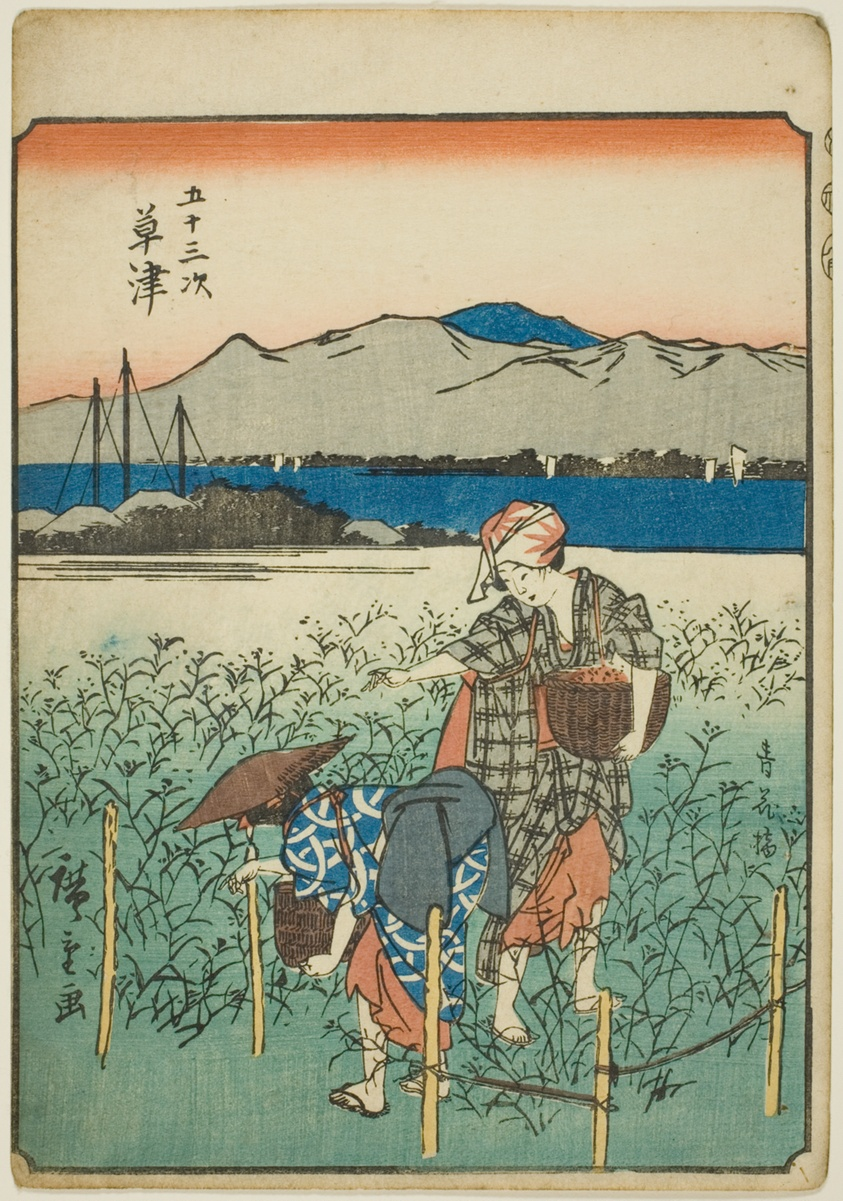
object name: Print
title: Kusatsu, from the series "Fifty-three Stations [of the Tokaido] (Gojusan tsugi)," also known as the Figure Tokaido (Jinbutsu Tokaido)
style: Japanese (culture or style)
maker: Utagawa Hiroshige 歌川 広重; Japanese, 1797-1858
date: 1852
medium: Color woodblock print; chuban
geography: Japan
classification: woodblock print; print